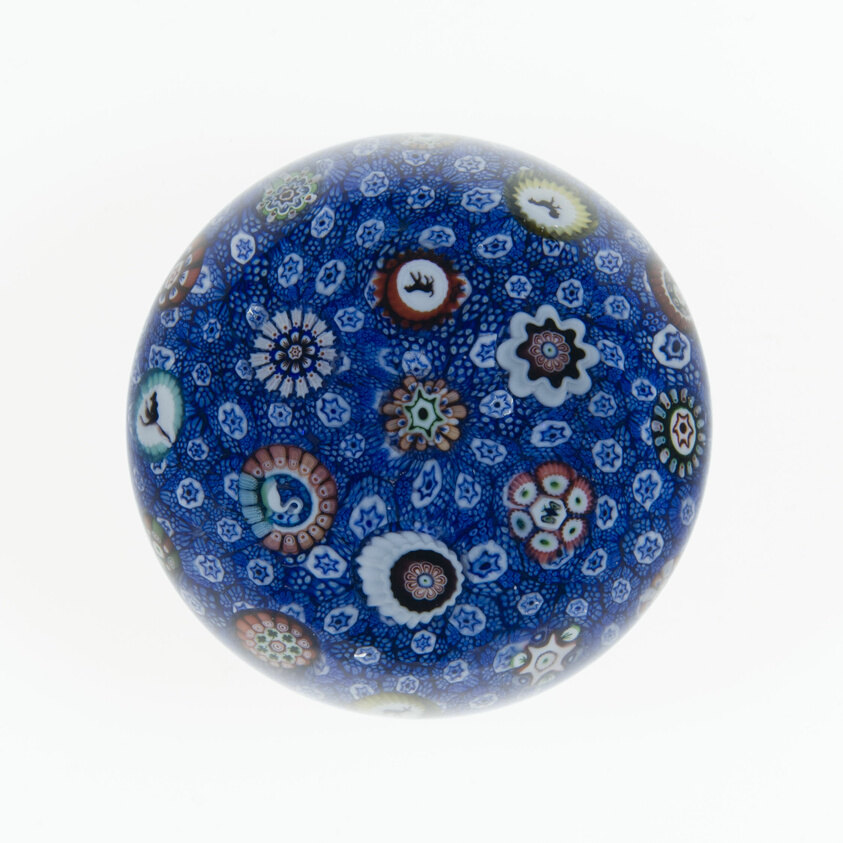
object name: Glass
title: Paperweight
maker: Baccarat Glassworks (Cristalleries de Baccarat); Lorraine, France, founded 1764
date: c. 1845–60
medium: Glass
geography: Baccarat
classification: paperweight; glass